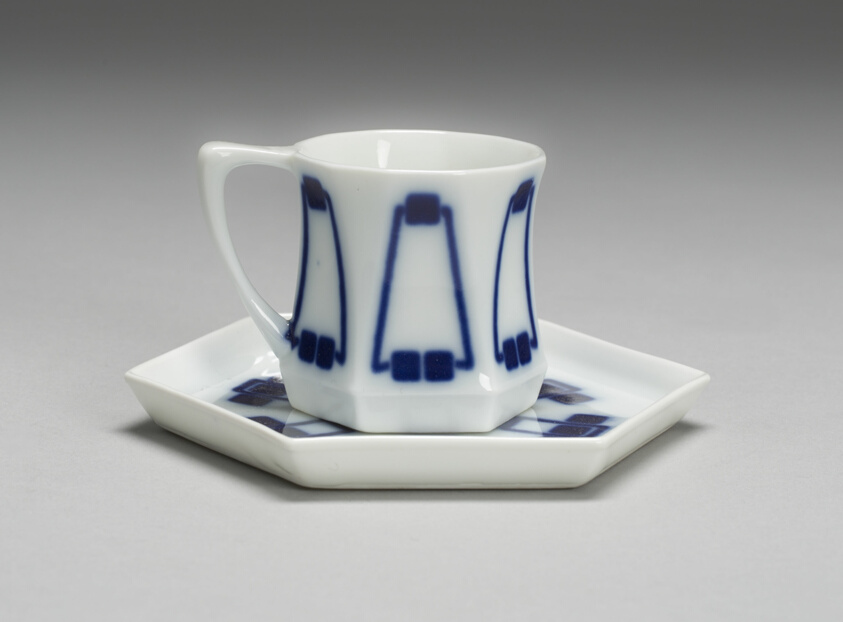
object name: Ceramics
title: Demitasse and Saucer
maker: Designed by Peter Behrens; German, 1868-1940; Manufactured by Gebrüder Bauscher; Weiden, Germany, founded 1881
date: 1900/02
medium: Hard-paste porcelain with underglaze blue decoration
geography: Weiden in der Oberpfalz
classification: teaware; ceramics; porcelain; european decorative arts